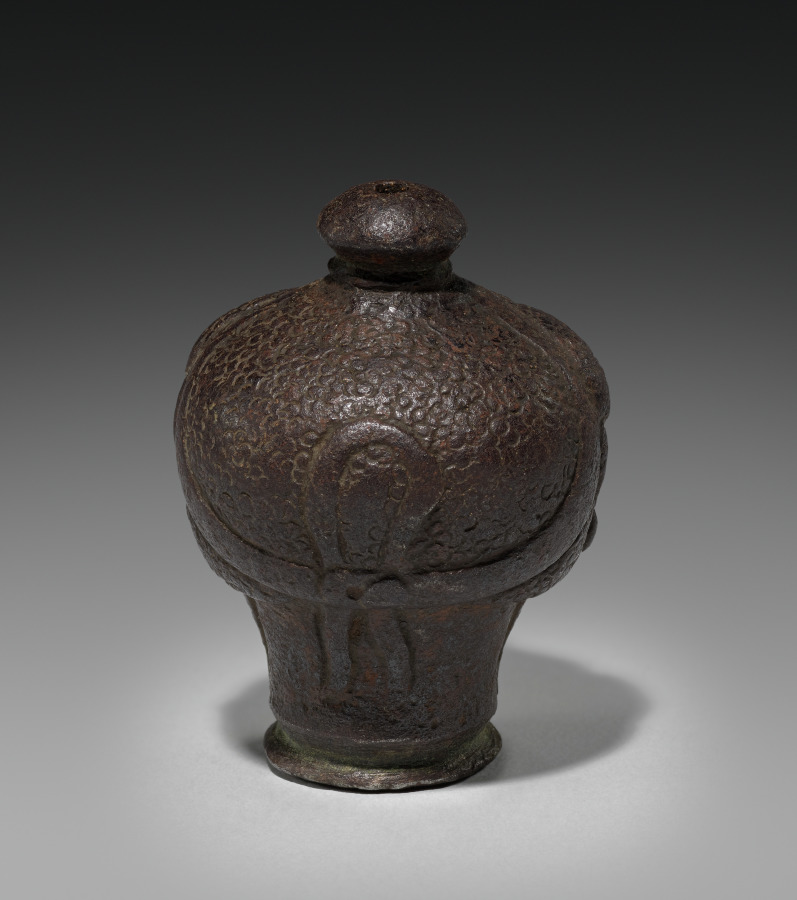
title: Pommel of Sword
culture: Italy, 17th century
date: 1600s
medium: steel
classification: Arms and Armor